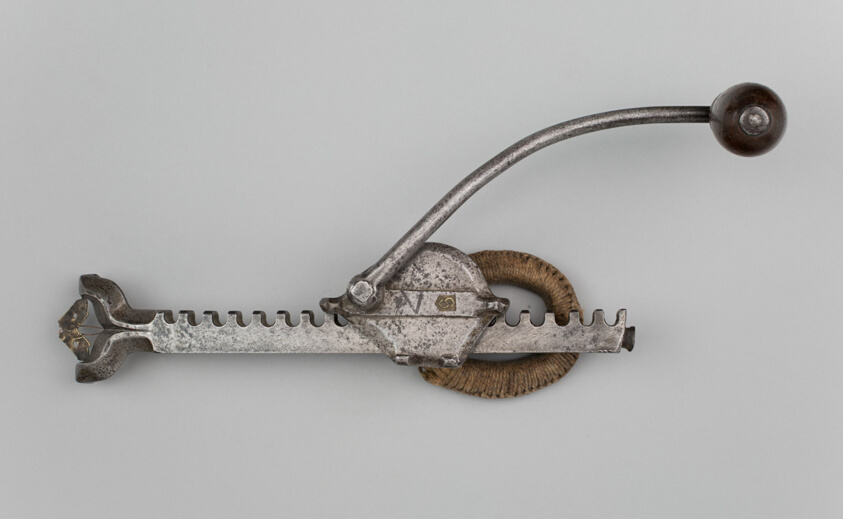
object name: Arms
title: Cranequin (Winder) for a Crossbow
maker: Southern German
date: first half of 16th century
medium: Iron, brass, and wood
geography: Germany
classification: crossbow; arms; arms and armor